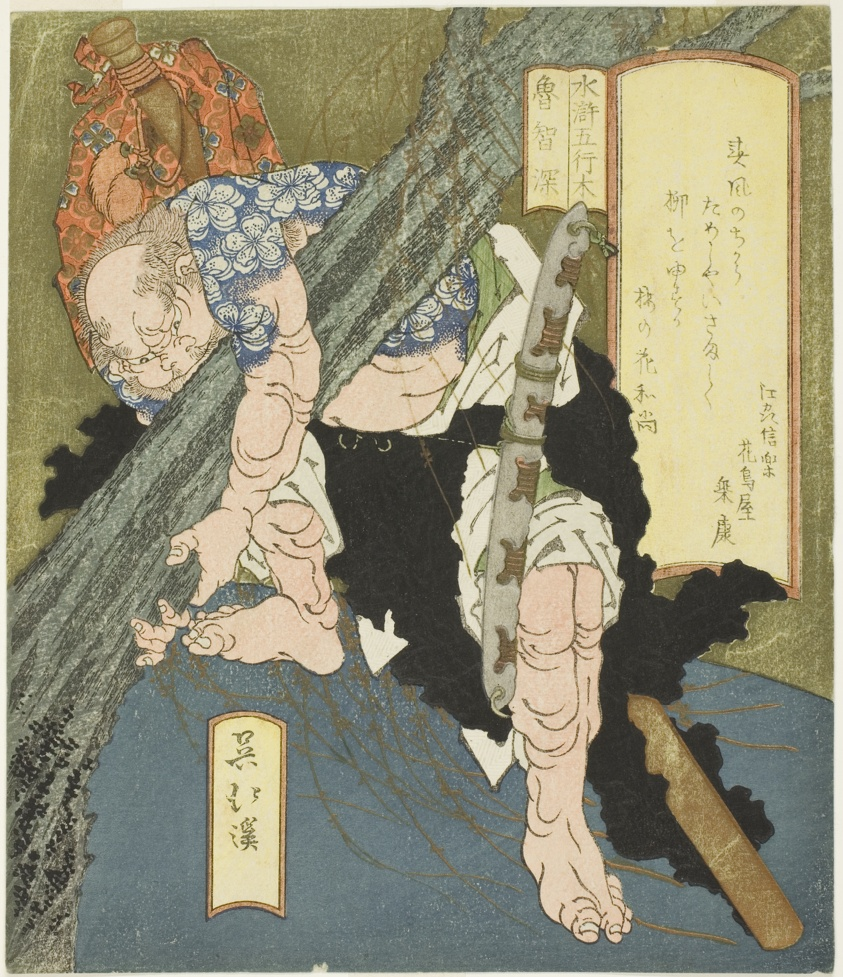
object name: Print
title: Wood: Lu Zhishen (Moku, Rochishin), from the series "The Five Elements of The Water Margin (Suiko gogyo)"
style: Japanese (culture or style)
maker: Totoya Hokkei (Japanese, 1780-1850)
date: early 1830s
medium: Color woodblock print; shikishiban, surimono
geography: Japan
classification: woodblock print; print; asian art